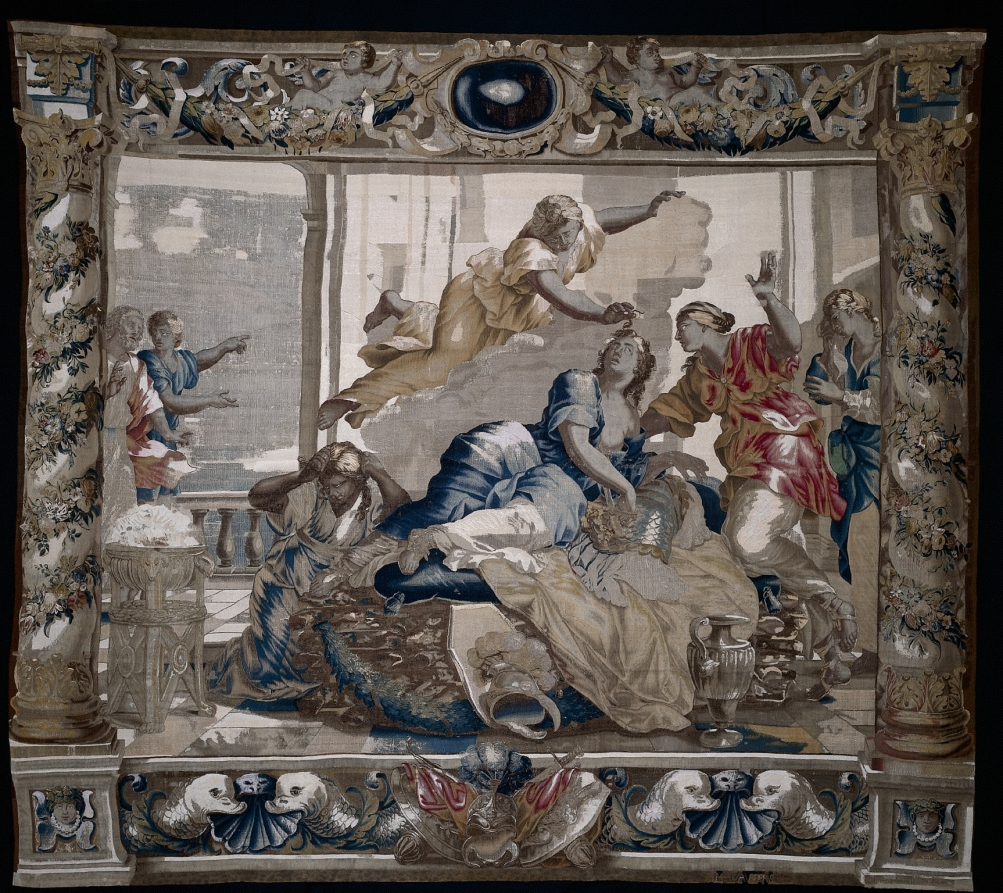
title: The Death of Dido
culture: Belgium, 17th century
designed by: Giovanni Francesco Romanelli (Italian, 1610–1662)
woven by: Michael Wauters (Flemish, 1679)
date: 1679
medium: tapestry weave: silk and wool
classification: Tapestry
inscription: signed lower right: M. Wavters.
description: Driven by despair, and to her sister's dismay, Dido throws herself onto a pyre of Aeneas's bed and clothes and pierces herself with his sword. Moved by pity, Jupiter's wife, Juno, sends Iris from heaven to cut a lock of Dido's hair and sacrifice it to the underworld so that Dido may die. Aeneas's fleet sails away in the distance.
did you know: Depicting the tragic love story of Dido and Aeneas, this tapestry is one of eight gifted to the museum for display in the armor court.